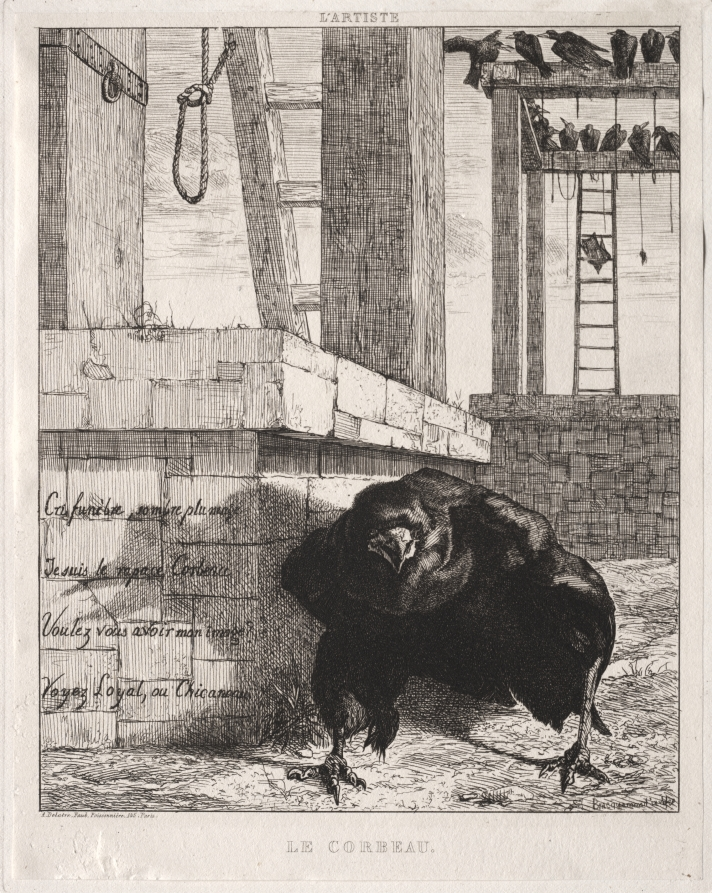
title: The Raven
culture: France, 19th century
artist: Félix Bracquemond (French, 1833–1914)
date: 1854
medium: etching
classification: Print